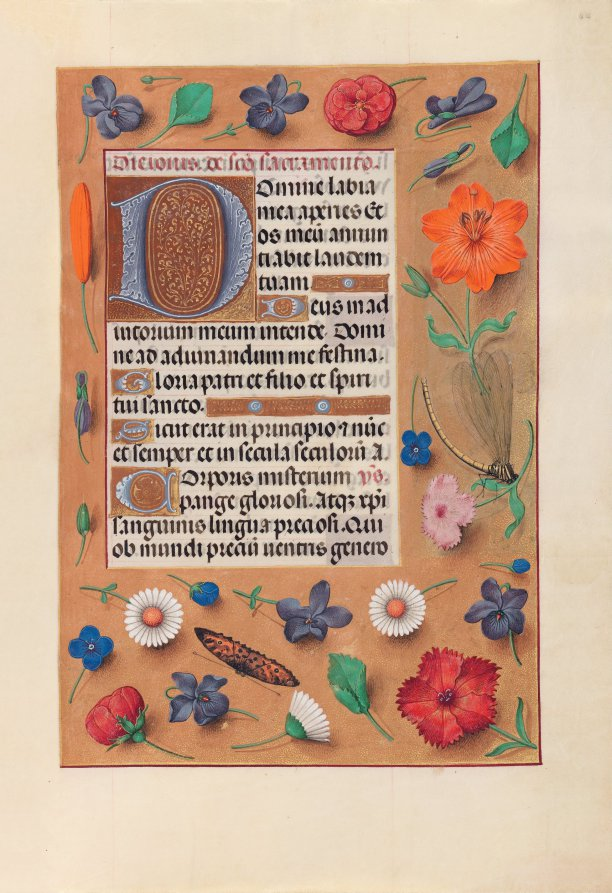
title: Hours of Queen Isabella the Catholic, Queen of Spain: Fol.44r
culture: Flanders, Ghent and Bruges, late 15th century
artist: Master of the First Prayerbook of Maximillian (Flemish, c. 1444–1519)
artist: and Associates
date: c. 1500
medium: ink, tempera, and gold on vellum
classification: Bound Volume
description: This manuscript was illuminated by a circle of at least five highly organized manuscript painters active in the Flemish cities of Ghent and Bruges. The principal illuminator was Alexander Bening, who painted the majority of the book's miniatures. Manuscripts produced by this circle of artists are renowned for the decoration of their borders, which typically feature a rich variety of realistically-painted flowers, birds, and butterflies. This prayer book, called a book of hours, was intended not for a cleric, but for the private devotions of a lay person-in this case, Isabella the Catholic, Queen of Spain (1451-1504). Isabella's coat of arms embellishes the book's frontispiece. It is unlikely that the book was commissioned by the Queen herself; rather, she probably received it as a diplomatic gift from someone courting her patronage, perhaps Cardinal Francisco Jimenez de Cisneros. A Franciscan friar, Jimenez was dependent upon Isabella for his advancement, first to the post of Queen's confessor in 1492, and then to Archbishop of Toledo in 1495.